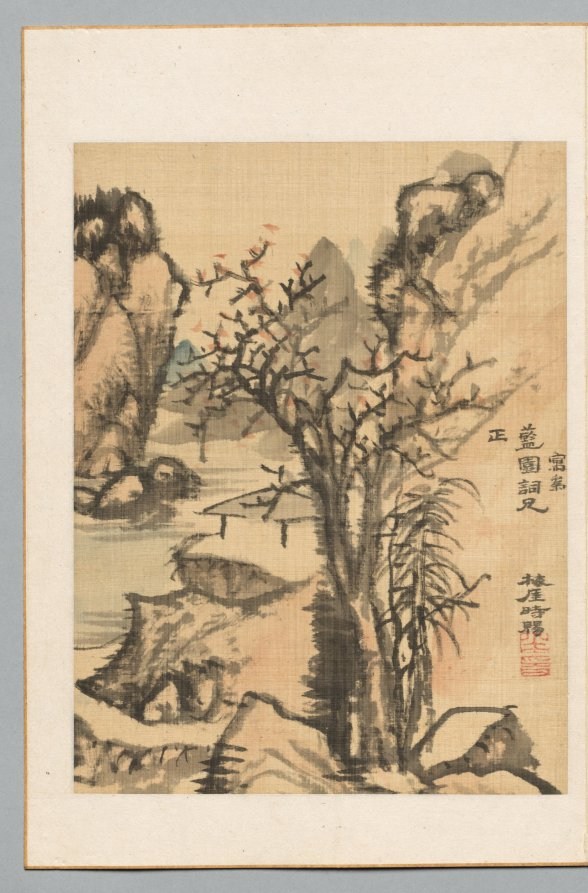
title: Landscape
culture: Japan, Edo period (1615–1868)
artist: Totoki Baigai (Japanese, 1749–1804)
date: late 1700s-early 1800s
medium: leaf from a pair of folding albums; ink and light color on paper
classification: Portfolio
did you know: In 1790 Totoki Baigai received permission to visit the closed port city of Nagasaki, where one could meet actual Chinese painters, but, after overstaying his permit, Baigai lost his job.